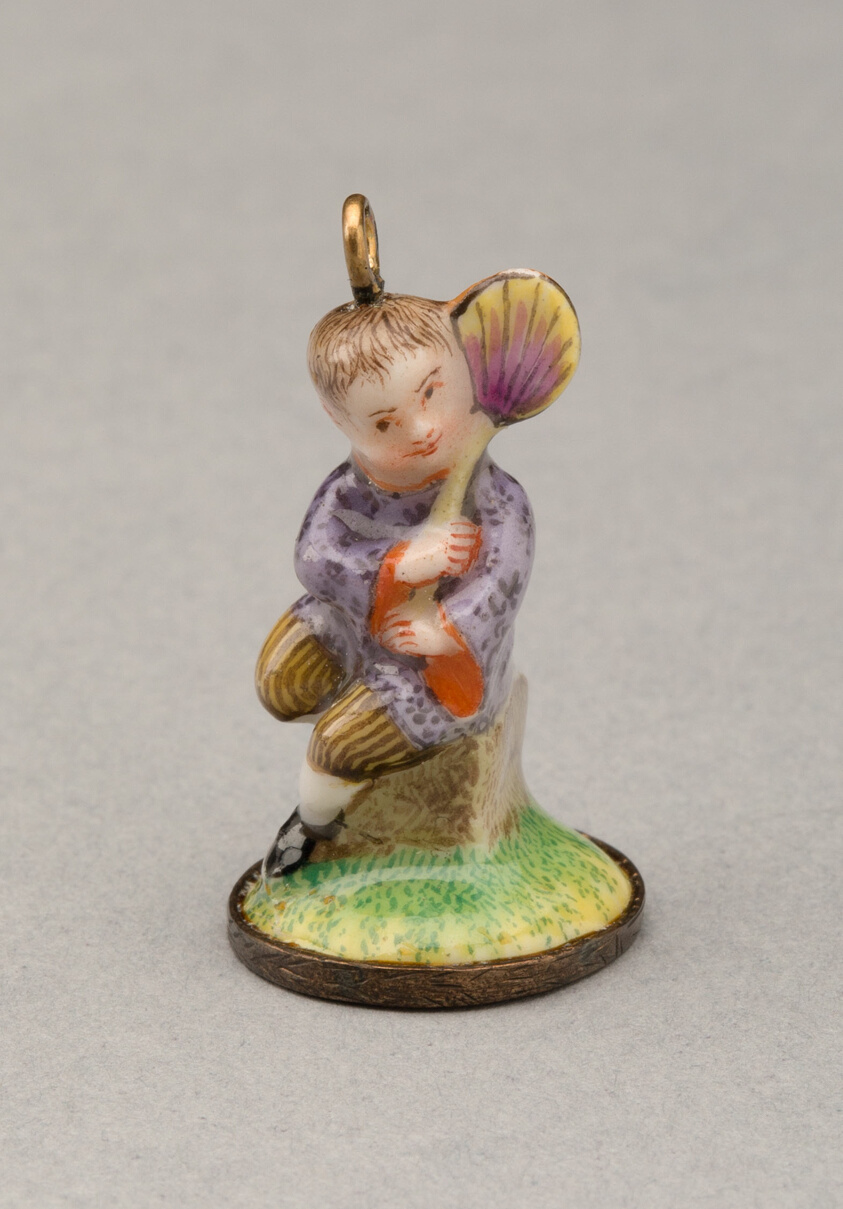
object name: Ceramics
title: Seal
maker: Chelsea Porcelain Manufactory; London, England, c. 1745-1784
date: 1750/70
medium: Soft-paste porcelain, polychrome enamels and gilding; hardstone and metal mount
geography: Chelsea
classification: porcelain; ceramics; european decorative arts